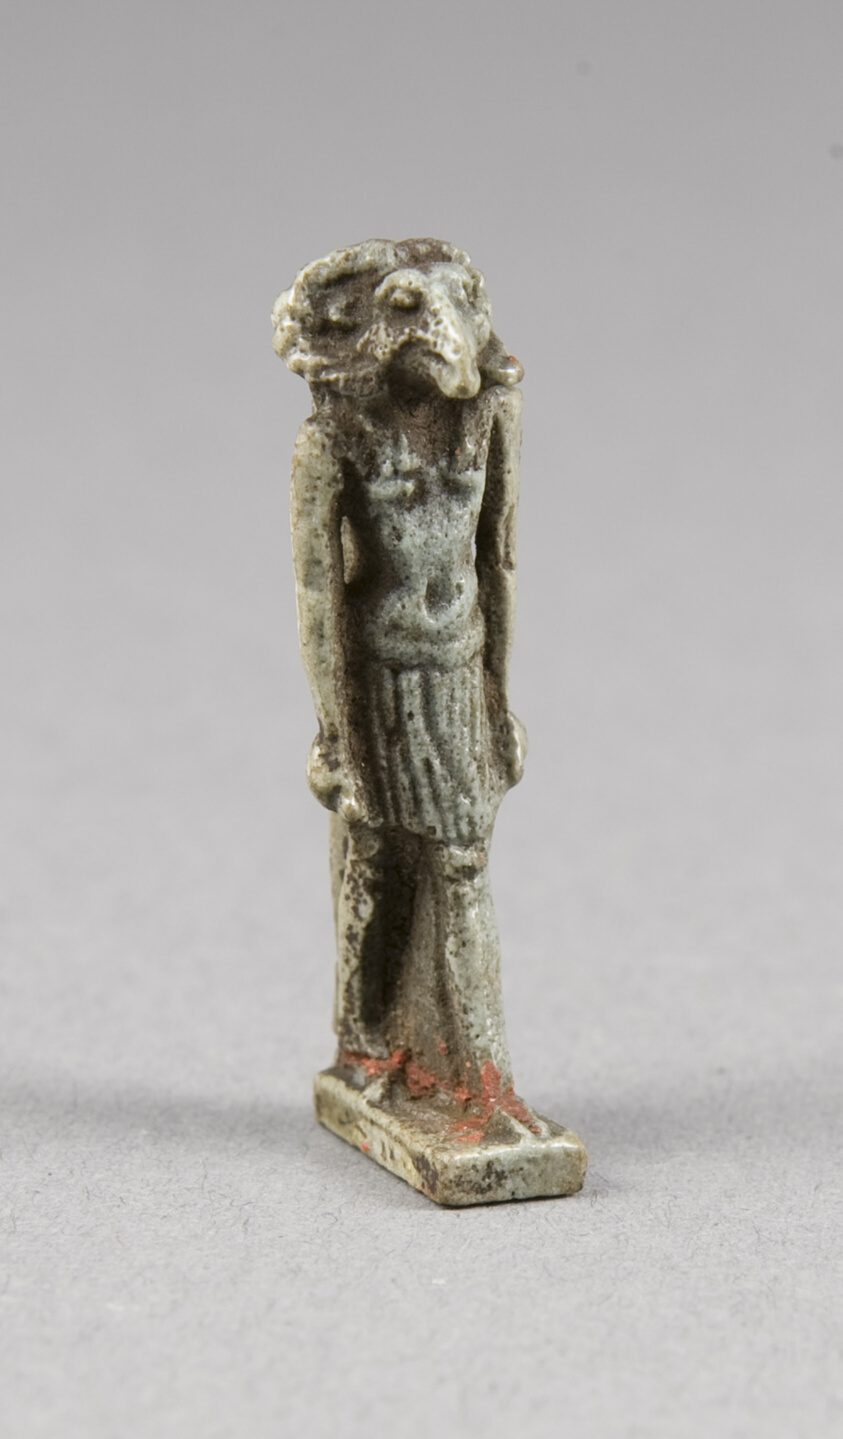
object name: Costume and Accessories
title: Amulet of the Ram-Headed God Amun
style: egyptian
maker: Egyptian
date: Late New Kingdom–Third Intermediate Period (about 1295–664 BCE)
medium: Faience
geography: Egypt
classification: amulet; ceramics; jewelry; ancient art; costume; faïence (composite material)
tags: gods (deities)